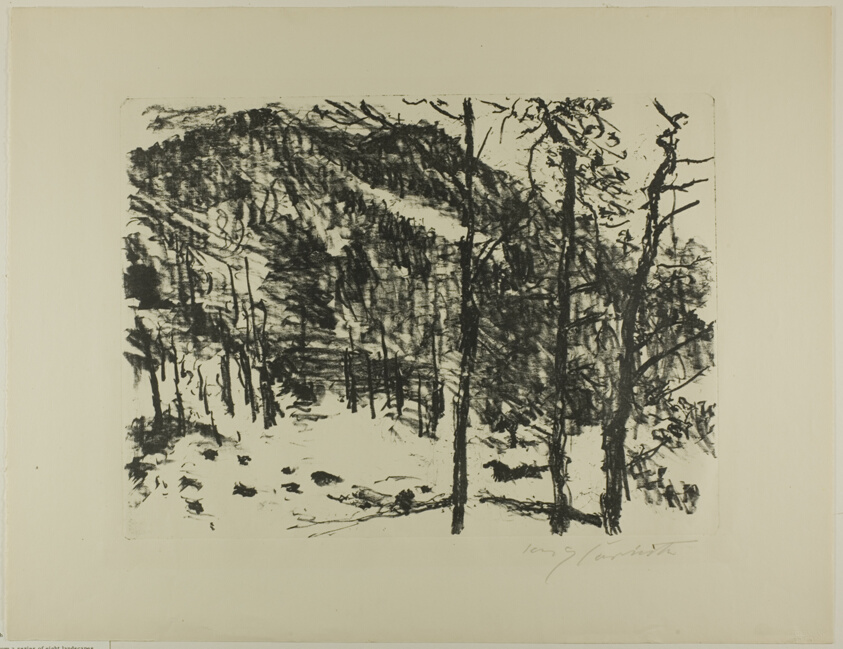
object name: Print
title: The Valley, from Early Spring in the Mountains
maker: Lovis Corinth (German, 1858-1925)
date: published 1922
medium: Lithograph on buff wove paper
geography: Germany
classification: lithograph; print; prints and drawing